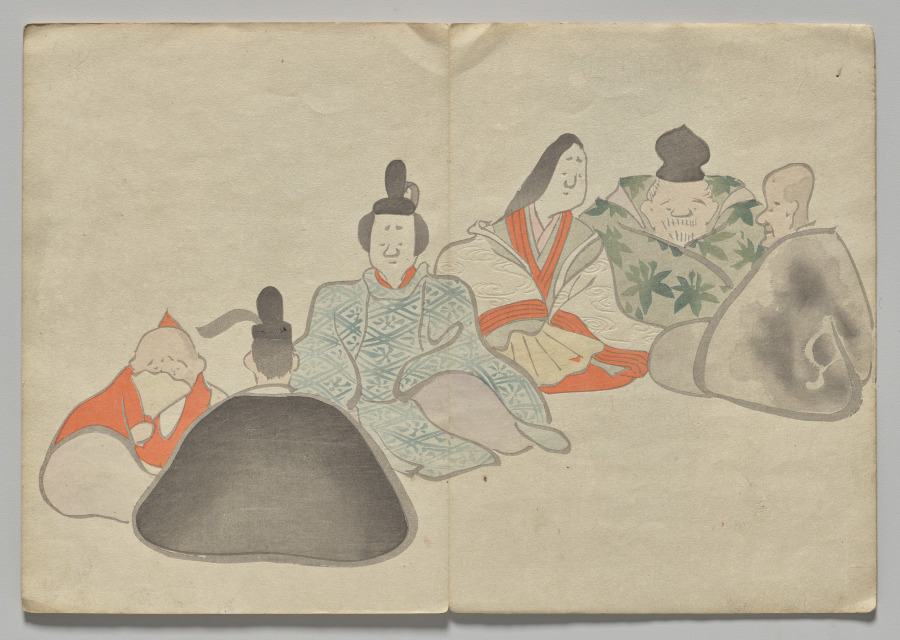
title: Scene from The Kōrin Picture Book (Volume 2)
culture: Japan, Edo period (1615–1868)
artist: Nakamura Hōchū (Japanese, d. 1819)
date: 1800s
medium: color woodblock printed book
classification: Bound Volume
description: Ogata Korin (1658-1716) was one of the most admired artists of Rimpa, or "decorative school painting." These books by the charming later-generation Rimpa artist Hochu record Korin's inventive designs.